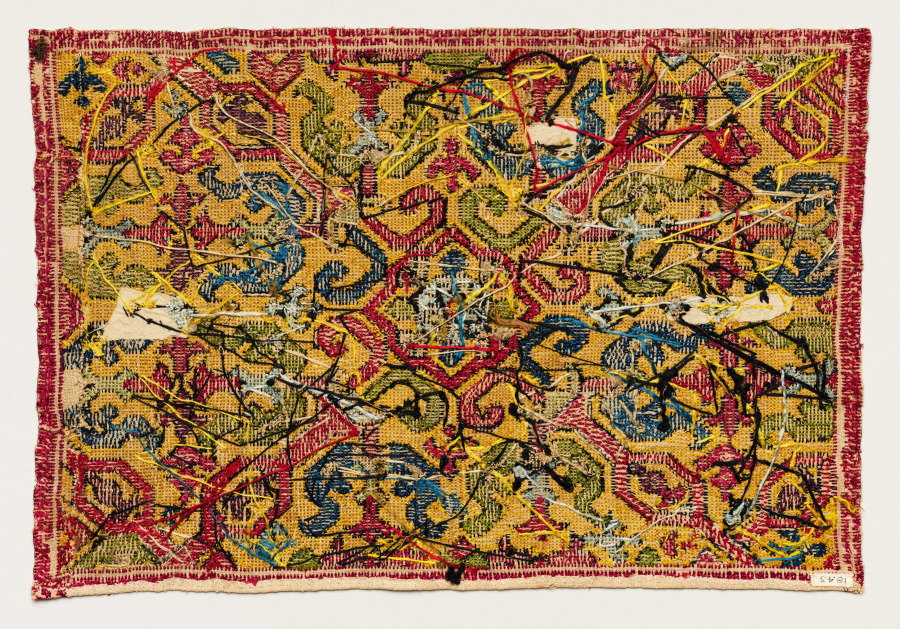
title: Fragment of a furnishing textile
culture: Africa, North Africa, Morocco, Chefchaouen, Moroccan embroiderer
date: 1600s–1700s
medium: Linen, silk, dye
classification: Embroidery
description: This fragment strongly resembles a component of furnishing textiles produced in the city of Chefchaouen, Morocco. While this is a cut fragment, the full textile would consist of several embroidered panels.